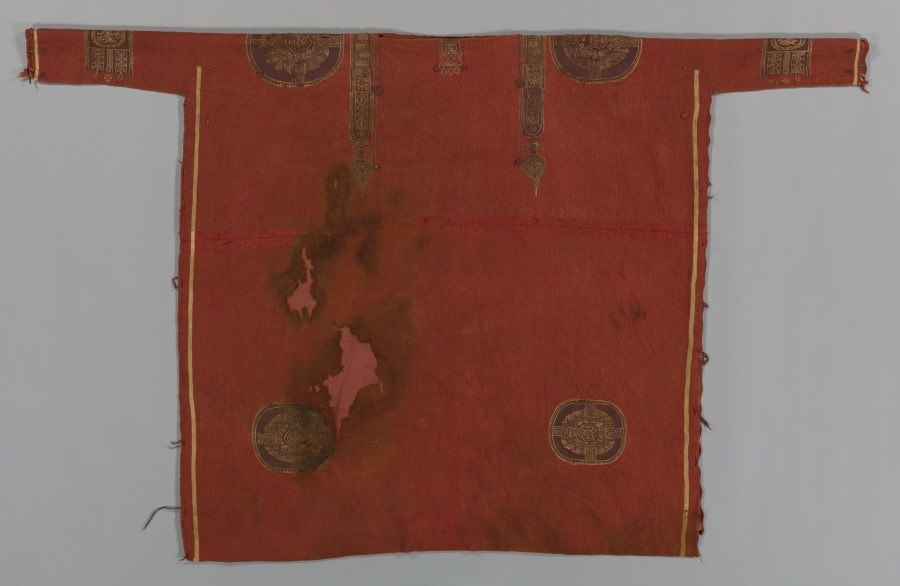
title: Luxurious Woolen Tunic with Decorated Bands and Roundels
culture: Egypt, Umayyad period (661–750)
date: 600s–700s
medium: undyed linen, dyed wool: weft-faced plain weave with slit- and dovetailed-tapestry weave, supplementary weft wrapping, embroidery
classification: Textile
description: Since the mid-200s CE tunics were the main garments worn in Egypt. This unisex tunic is decorated on the front and back with the same geometric and figural motifs, including men on horseback hunting and geometric braided knots that were believed to protect the wearer from harm. A red background was favored in the early Islamic period. Made of thick wool for cooler weather, it was woven in one complete piece with the front, back, and sleeves in this exact shape and size. The tunic’s owner repaired it on the left side and shortened it nearly two inches by sewing a fold around the waist. The discoloration and deterioration indicate the garment may have been used in a burial.